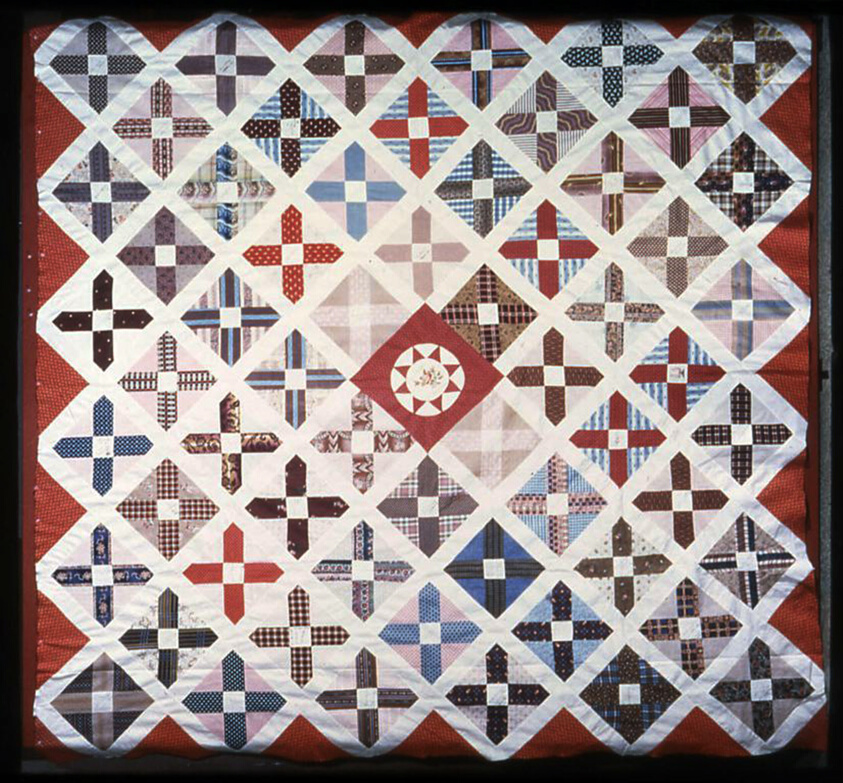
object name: Textile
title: Bedcover (Friendship Quilt) (Unfinished)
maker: United States, probably Connecticut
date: 1848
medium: Cotton, plain weave; glazed; some inscribed with sepia ink; cotton, plain weave; roller printed; and center of linen, plain weave self-patterned by main warp and ground weft floats; embroidered with wool in stem stitches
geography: United States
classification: textile; needlework - quilt